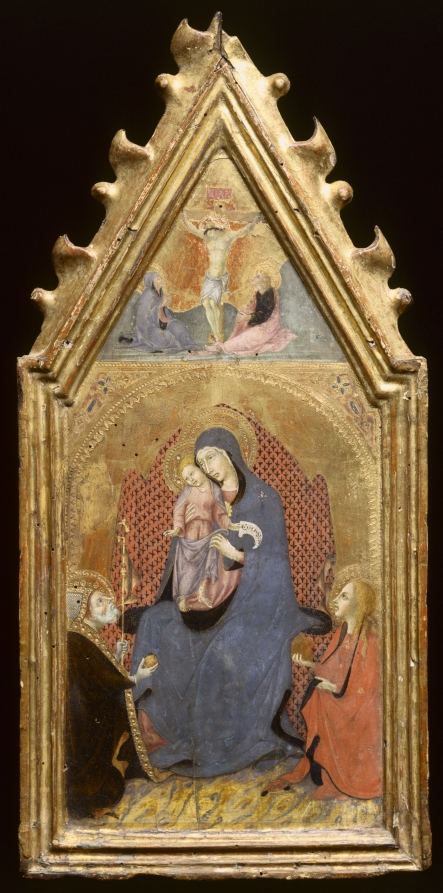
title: Virgin and Child Adored by Saints Mary Magdalene and Nicolas of Bari; Christ Crucified with the Virgin and Saint John the Evangelist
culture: Italy, Siena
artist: Sano di Pietro (Italian, 1406–1481)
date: 1400s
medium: tempera and gold on wood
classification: Painting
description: The artist covered the sides and reverse of this panel with a thin layer of gesso (a type of plaster), allowing the texture of the rough wood to remain visible. He then painted it to resemble porphyry, a beautiful and valuable stone.